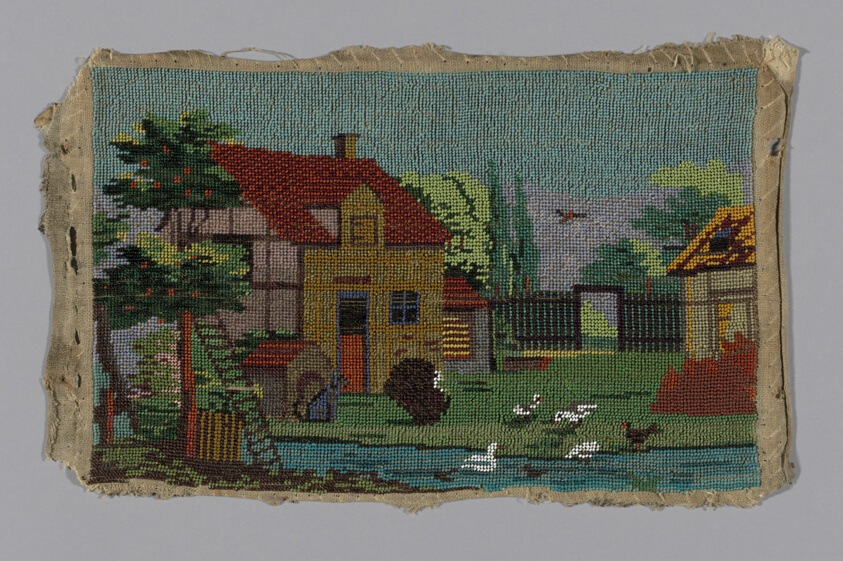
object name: Textile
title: Picture (Beaded)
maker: England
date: 19th century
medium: Victorian beadwork in multicolor; double gilt frame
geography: England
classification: textile; needlework (visual works); bead; beadwork